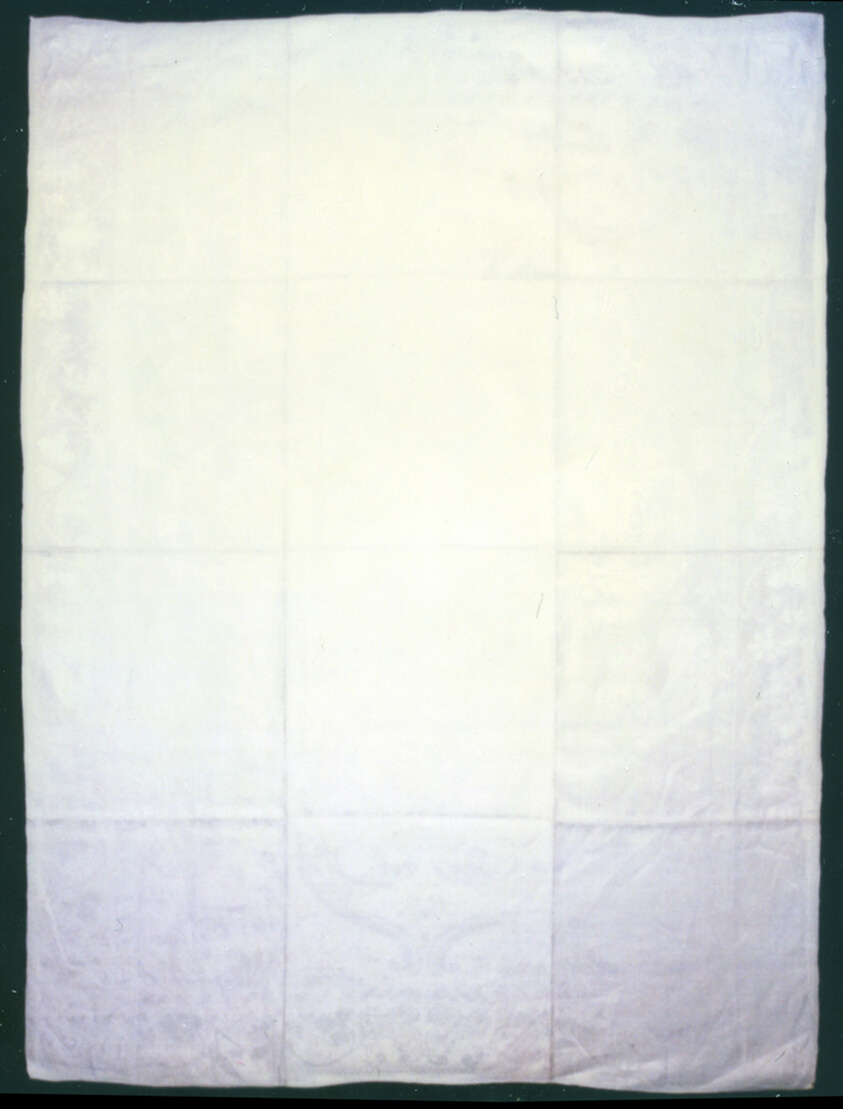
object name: Textile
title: Napkin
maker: Possibly Netherlands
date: 1699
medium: Linen, satin weave self-patterned by reversing of faces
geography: Netherlands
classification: textile; weaving